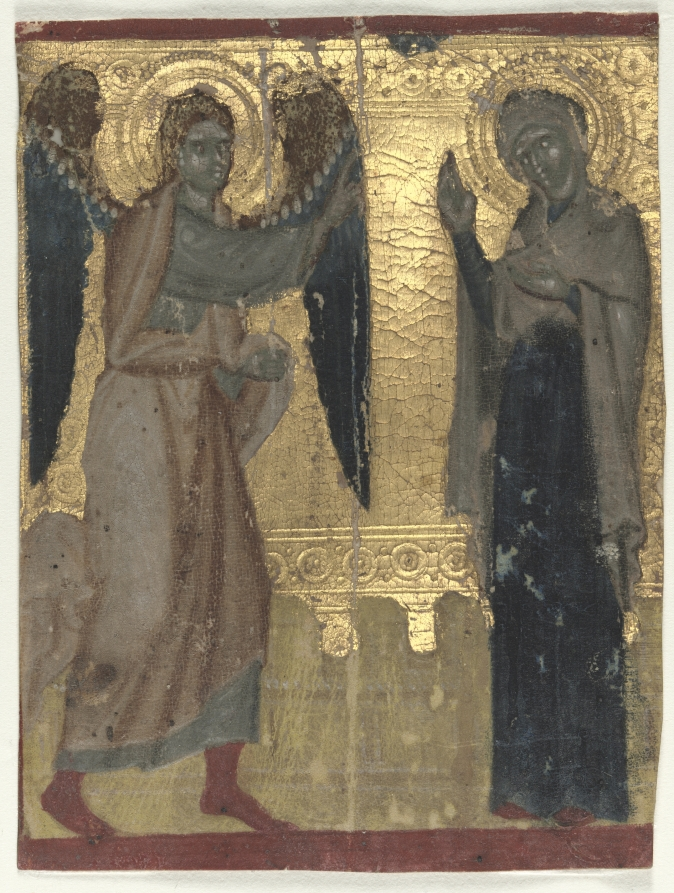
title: Miniature Excised from a Book of Hours: The Annunciation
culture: Italy, Venice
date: c. 1280–1300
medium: tempera and gold on parchment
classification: Manuscript